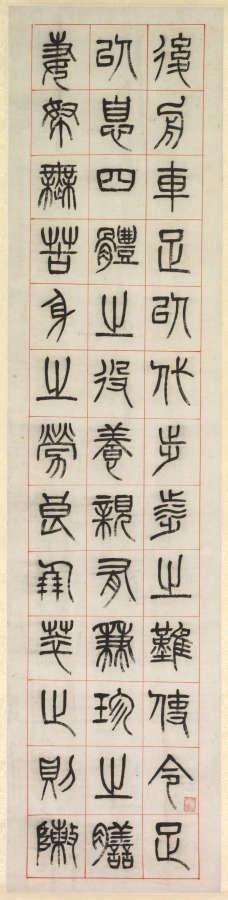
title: On Happiness, Calligraphy in Seal Script Style (zhuanshu)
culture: China, Changsu, Qing dynasty (1644-1911)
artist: Yang Yisun (Chinese, 1813–1881)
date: 1871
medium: hanging scroll, ink on paper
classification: Painting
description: Yang Yisun transcribed this ancient text on six narrow scrolls, starting at the top right and ending at the bottom left. Yang emphasizes the text’s historic nature by using the seal script style found on stone steles and bronze vessels. On Happiness features reflections of a scholar on a leisurely life in the countryside, composed by Han dynasty official Zhongchang Tong, who died the year the Han dynasty collapsed (AD 220). The idyllic life described in the text may bean evocation of the past in a time of national crisis. A decade before Yang wrote these scrolls, Anglo-French forces had looted and burned the Summer Palace in Beijing. At the same time, the domestic Taiping rebellion (1850–64), led by a religious fanatic to overthrow the Qing government, had devastated Yang’s homeland, the Jiangnan region, with an estimated 20 million lives lost.